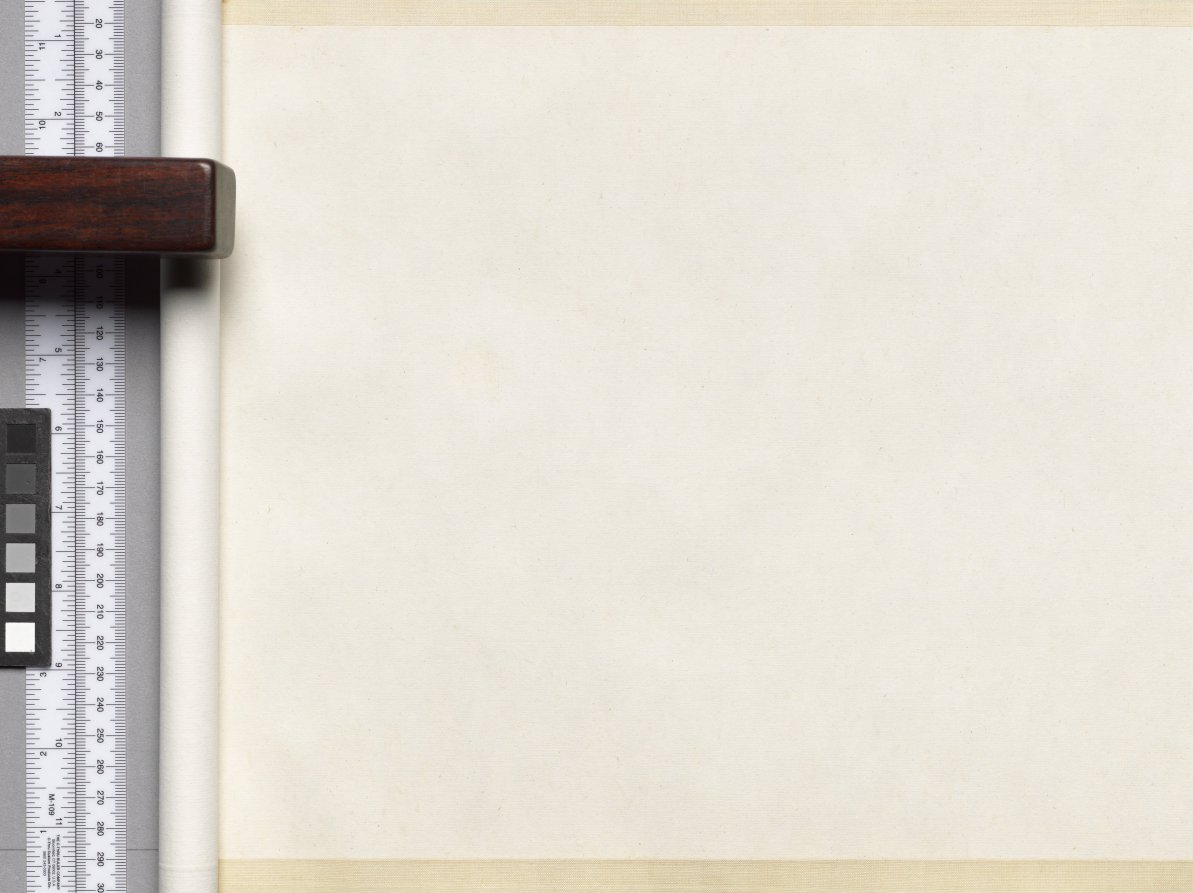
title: Sericulture (The Process of Making Silk)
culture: China, Southern Song dynasty (1127-1279)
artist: attributed to Liang Kai (Chinese, mid-1100s–early 1200s)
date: early 1200s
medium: Handscroll; ink and color on silk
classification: Painting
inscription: 3 colophons and 7 seals of Ch'eng Ch'i (20th c.).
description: By the Southern Song period, the economic center of the silk industry had shifted to the lower Yangzi delta, while the north continued to be troubled by wars. Divided into three sections, the handscroll illustrates 14 steps in the process of making silk, from the raising of silkworms to the weaving of silk cloth. The scroll’s scenes follow the illustrations of Lou Shou’s (1090–1162) Pictures of Tilling and Weaving (gengzhi tu), the first recorded painting of this genre, which was conceived in Hangzhou around 1145. However, in the Cleveland painting the artist groups several scenes of sericulture together under the roof of an open structure.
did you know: The painting is attributed to Liang Kai, a court artist active from about 1201 to 1204 at the Imperial Painting Academy in the city of Hangzhou, a major silk weaving center from that time to the present day.